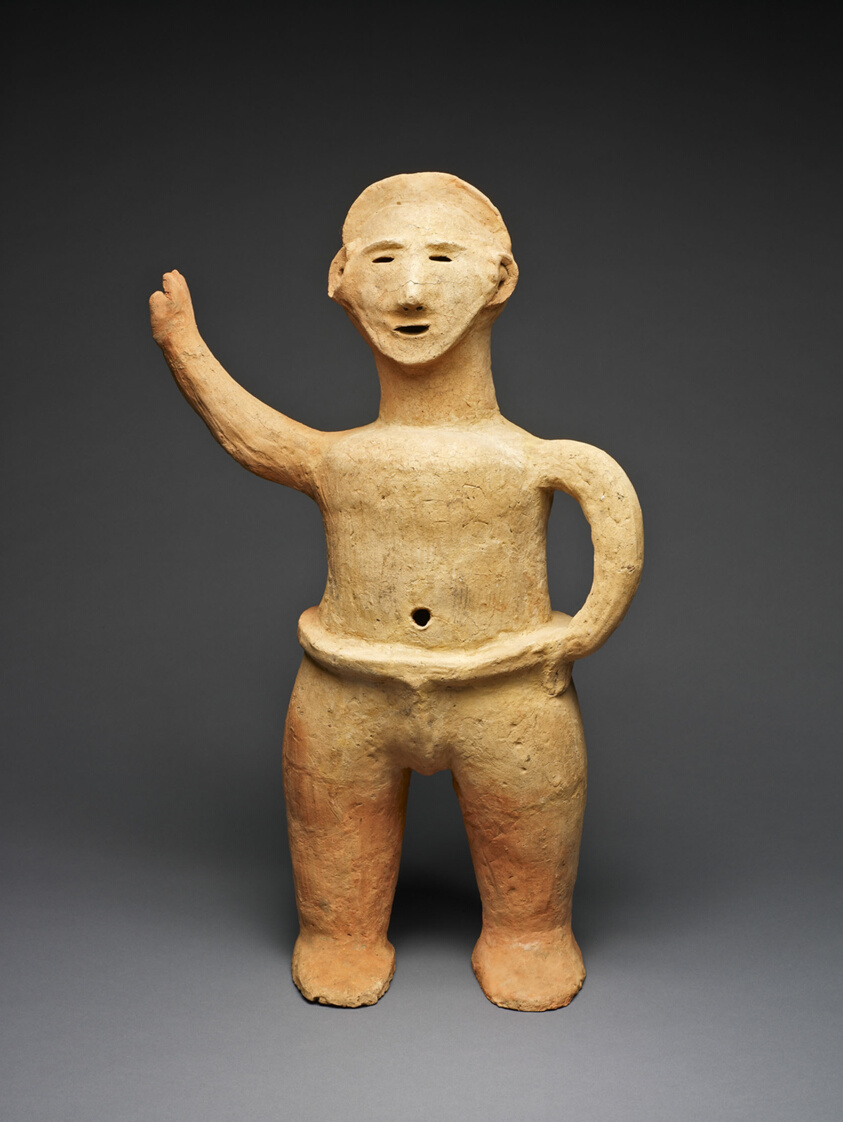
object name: Religious/Ritual Object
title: Wrestler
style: Japanese (culture or style)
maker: Japan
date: 5th–6th century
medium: Earthenware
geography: Japan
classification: ritual objects